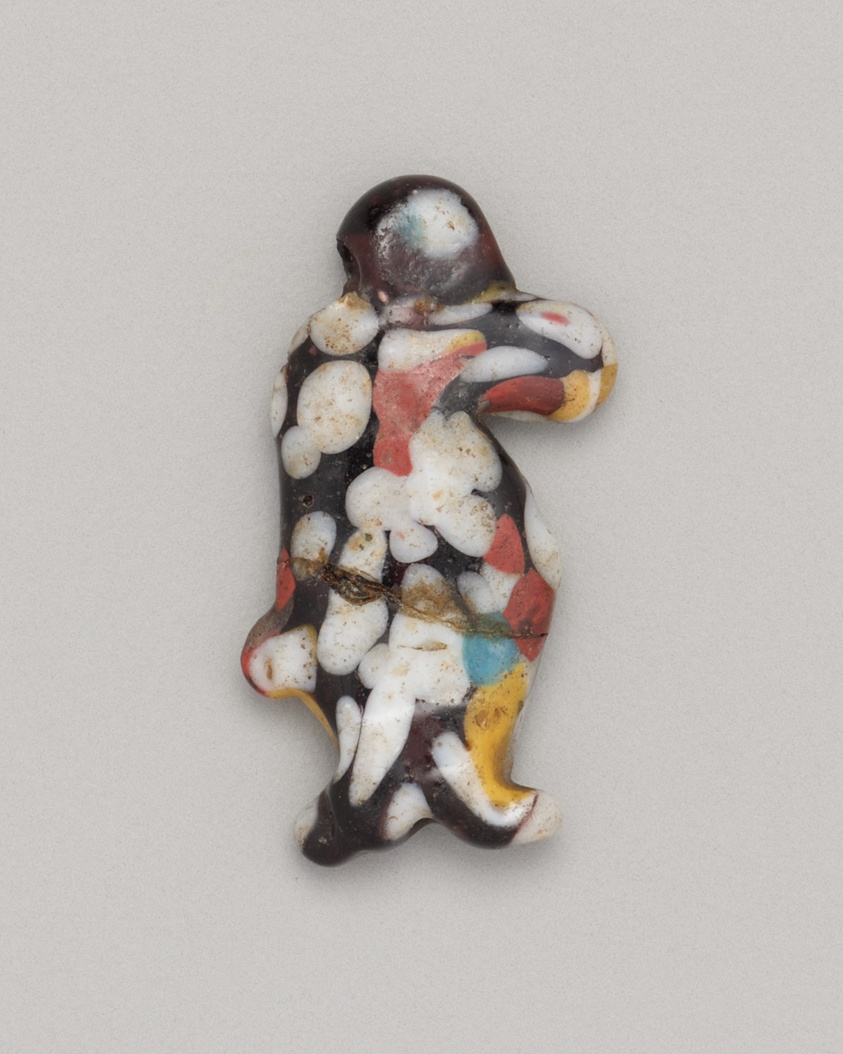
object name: Costume and Accessories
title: Taweret Amulet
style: egyptian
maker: Egyptian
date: New Kingdom, Dynasty 18, reign of Akhenaten (about 1352–1336 BCE)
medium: Mosaic glass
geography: Egypt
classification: amulet; glass; jewelry; ancient art; costume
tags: goddesses